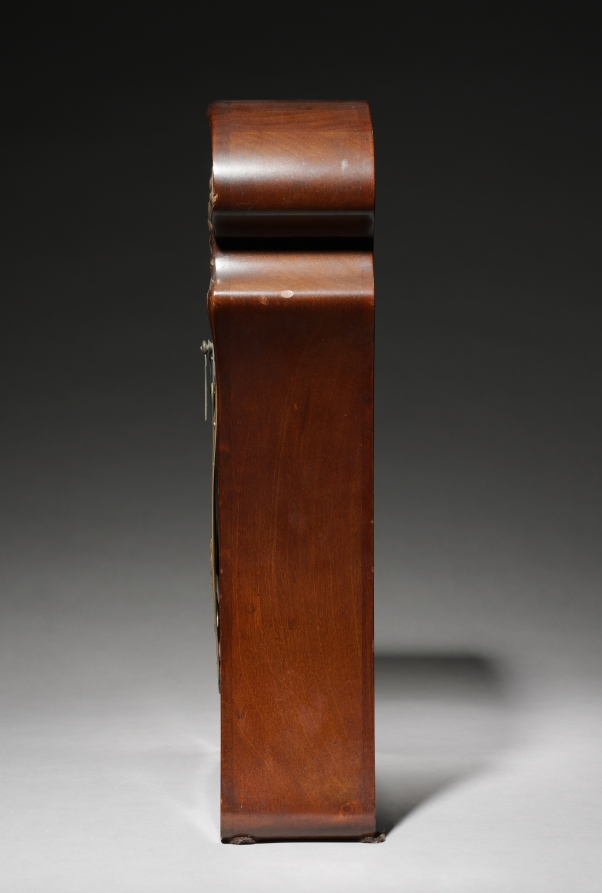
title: Mantle Clock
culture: America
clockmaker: Lenzkirch Clock Factory (German)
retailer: Tiffany & Co. (America, New York, est. 1837)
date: 1901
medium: brass, mahogany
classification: Wood